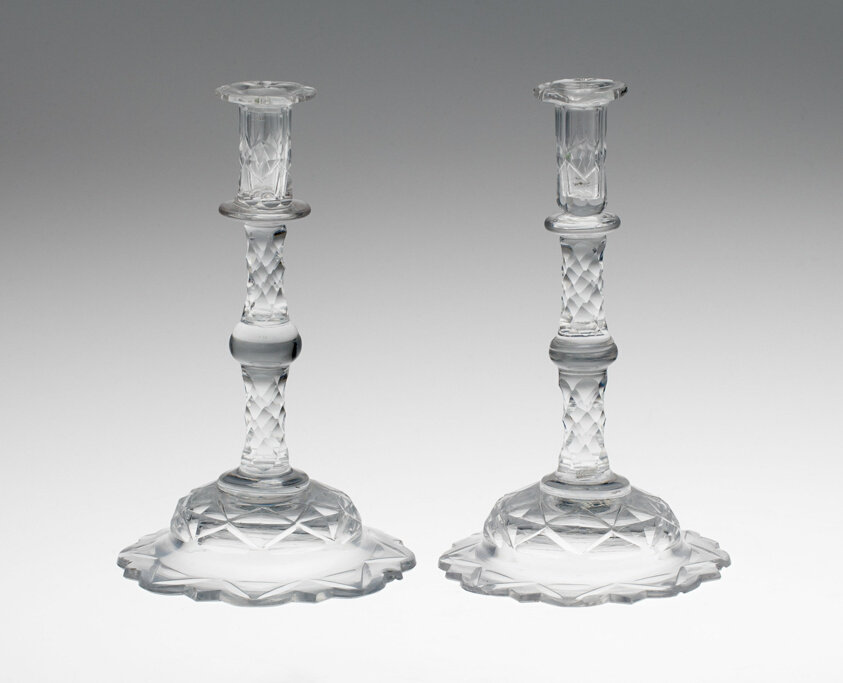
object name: Glass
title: Two Taper Sticks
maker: England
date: 18th century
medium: Glass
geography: England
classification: glass; european decorative arts